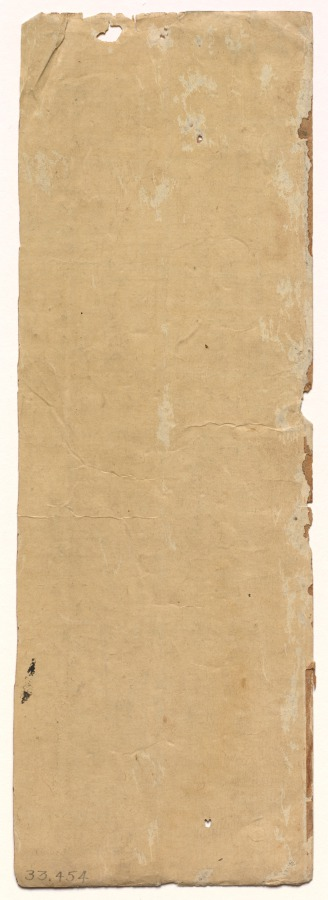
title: Text of the Perfection of Wisdom (Mahāprajñāpāramitā) Sūtra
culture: China, Tang dynasty (618-907)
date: c. 700s-800s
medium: Album leaf, ink on dyed paper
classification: Bound Volume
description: This precious text fragment is one of the earliest calligraphies in the collection. The text is copied from the Mahāprajñāpāramitā Sūtra (also called the Perfection of Wisdom Sutra (Chinese: 摩訶般若波羅蜜多經; Móhā Bōrĕ Bōluómìduō jing). The passage is part of a collection of sacred Buddhist texts written in India around 100 BC to AD 600 that were translated in the 700s by the Chinese monk Xuanzang. The paragraph is written in regular script style (kaishu) with deep black characters on brown aged paper that may have originally been dyed yellow. Mahāyāna Buddhism teaches that faithfully copying sutra texts is a good deed that helps one accumulate merit and the Buddha’s blessings—a way to gain rebirth in the Western Paradise.